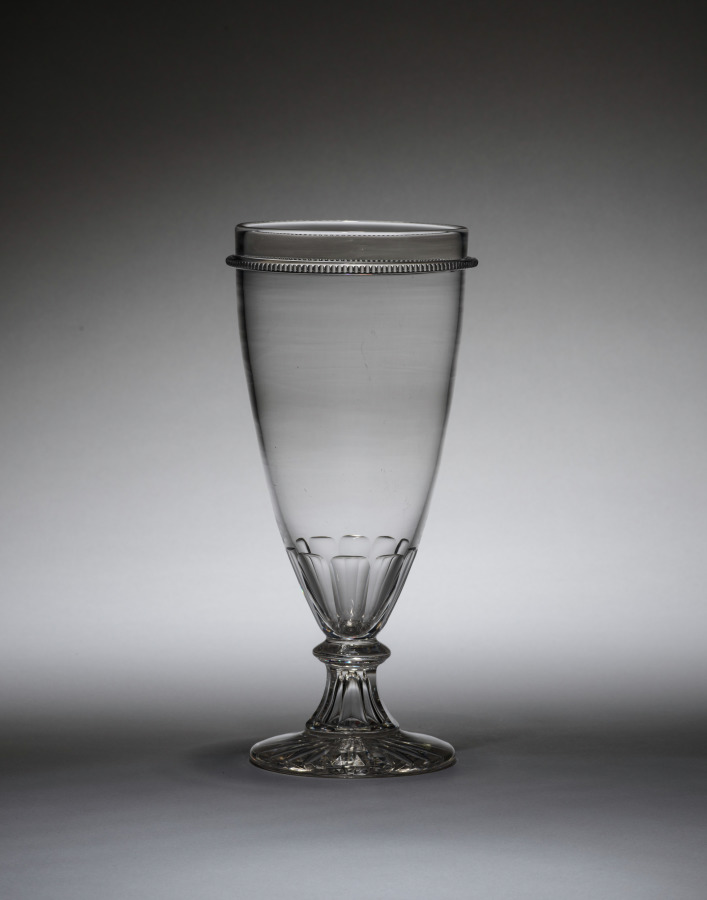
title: Candy Jar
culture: America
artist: firm of Christian Dorflinger (American, 1828–1915)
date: 1869–1880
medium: glass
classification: Glass